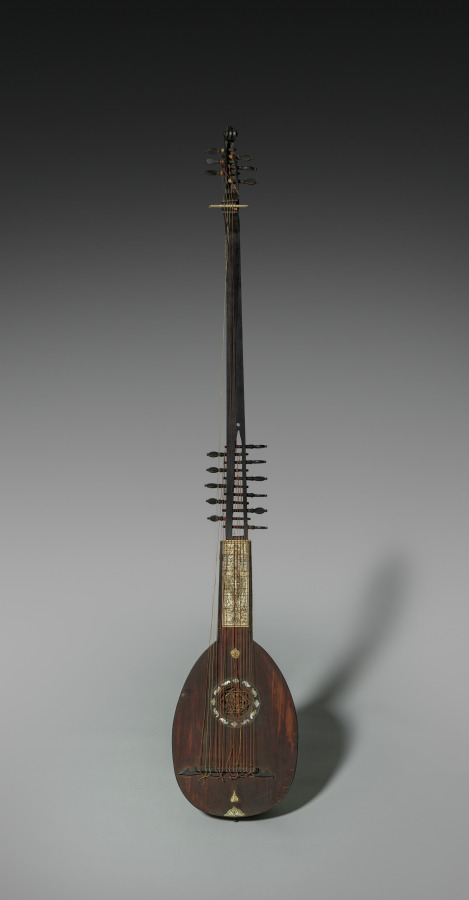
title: Chitarrone (or Archlute)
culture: Italy, Rome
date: late 1600s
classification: Musical Instrument